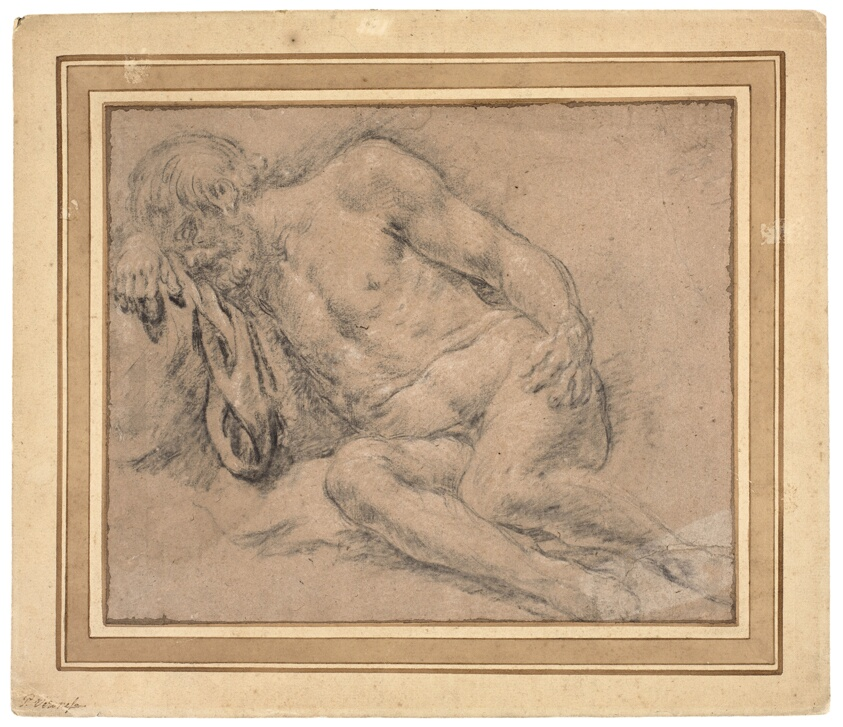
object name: Drawing and Watercolor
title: Sleeping Male Nude, perhaps for the Drunkenness of Noah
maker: Paris Bordone (Italian, 1500–1571)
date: c. 1550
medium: Black and white chalk on light brown paper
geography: Italy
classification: drawings (visual works); paper; chalk; prints and drawing